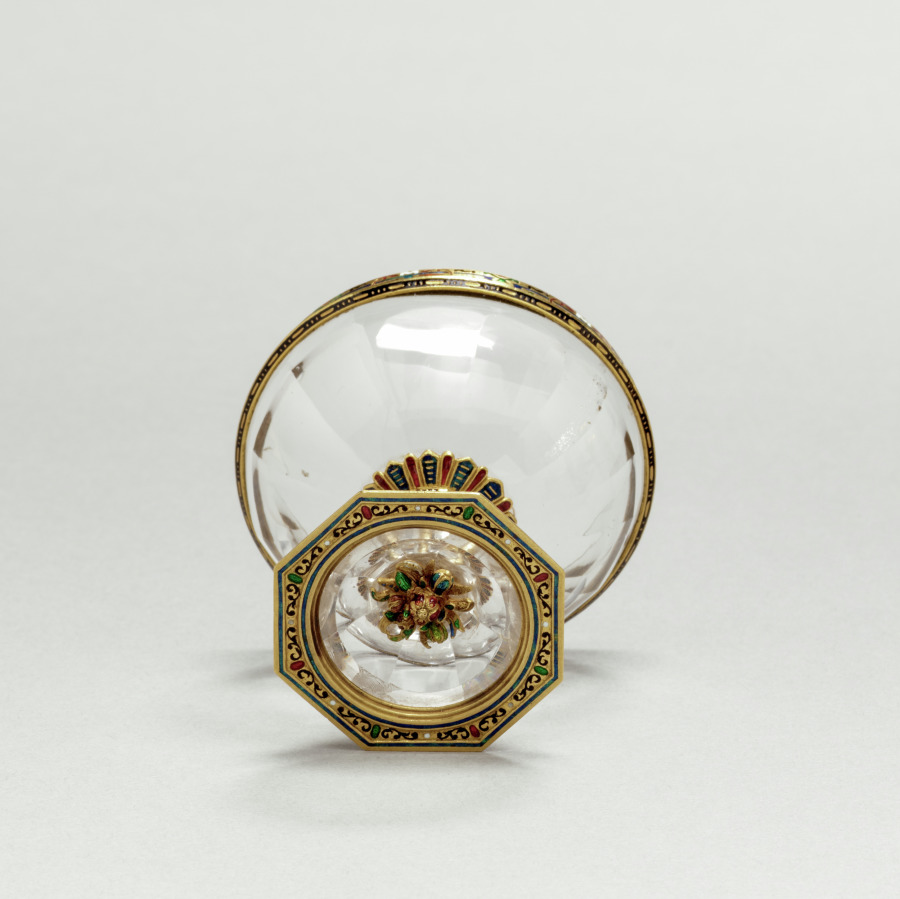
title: Double Cup (Upper Cup)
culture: Italy, late 16th century (possibly 19th century forgery or 16th and 19th century pastiche)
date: late 16th century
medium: rock crystal set in enameled gold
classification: Enamel